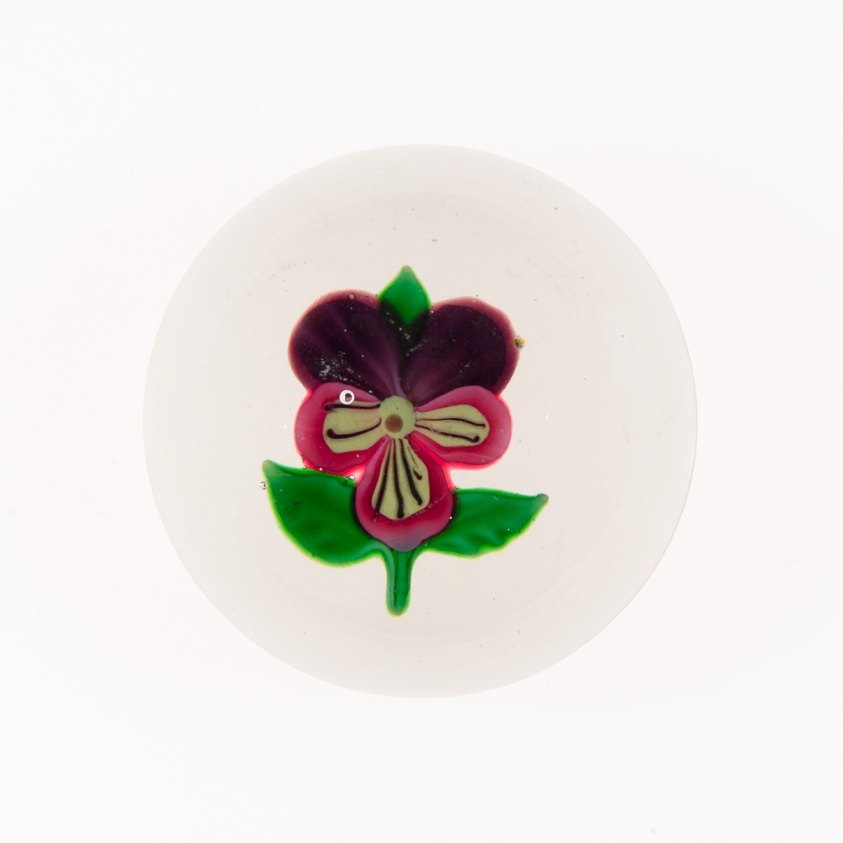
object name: Glass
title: Paperweight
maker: Saint-Louis Glassworks (Cristalleries de Saint-Louis); Lorraine, France, founded 1586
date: 19th century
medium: Glass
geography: Saint-Louis-lès-Bitche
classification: paperweight; glass